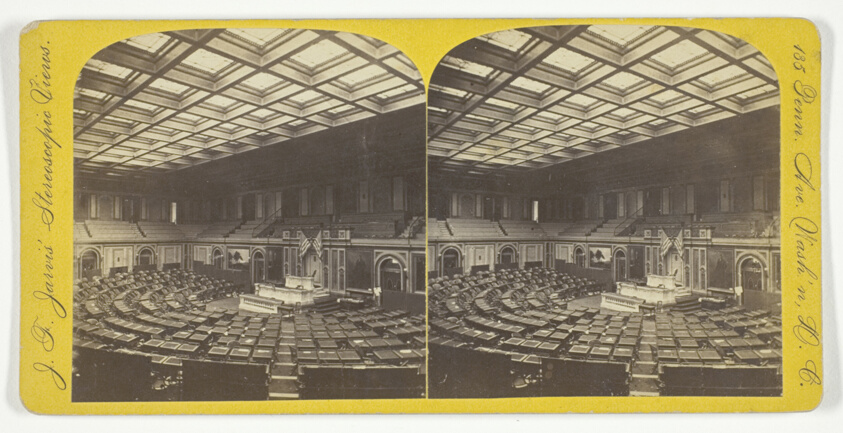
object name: Photograph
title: House of Representatives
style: 19th century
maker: J. F. Jarvis (American, 1850-1931)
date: Late 19th century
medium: Albumen print, stereo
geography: District of Columbia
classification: photography; photograph; albumen silver print; stereograph (albumen)